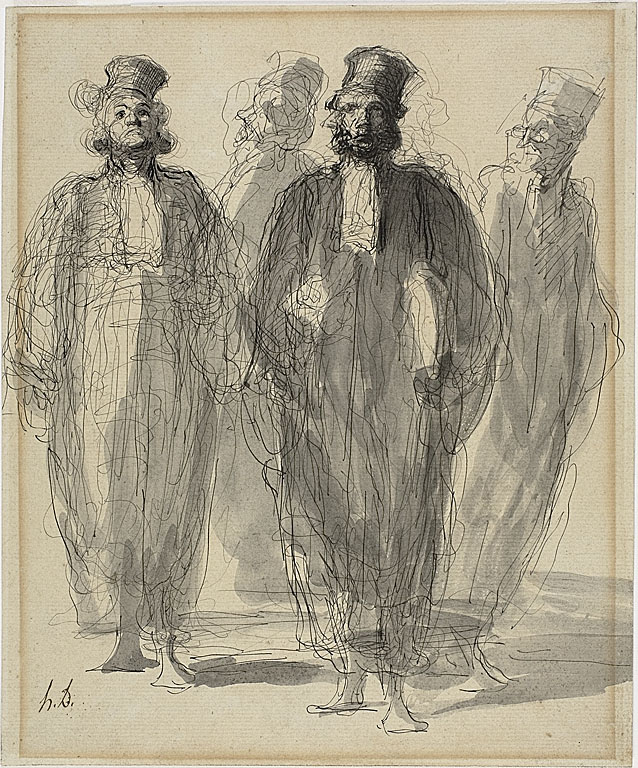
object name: Drawing and Watercolor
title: Four Lawyers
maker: Honoré Victorin Daumier; French, 1808-1879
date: 1867/1870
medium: Pen and black ink and brush and gray wash, on grayish-cream laid paper, laid down on cream wove paper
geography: France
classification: pen and ink drawings; drawings (visual works); prints and drawing